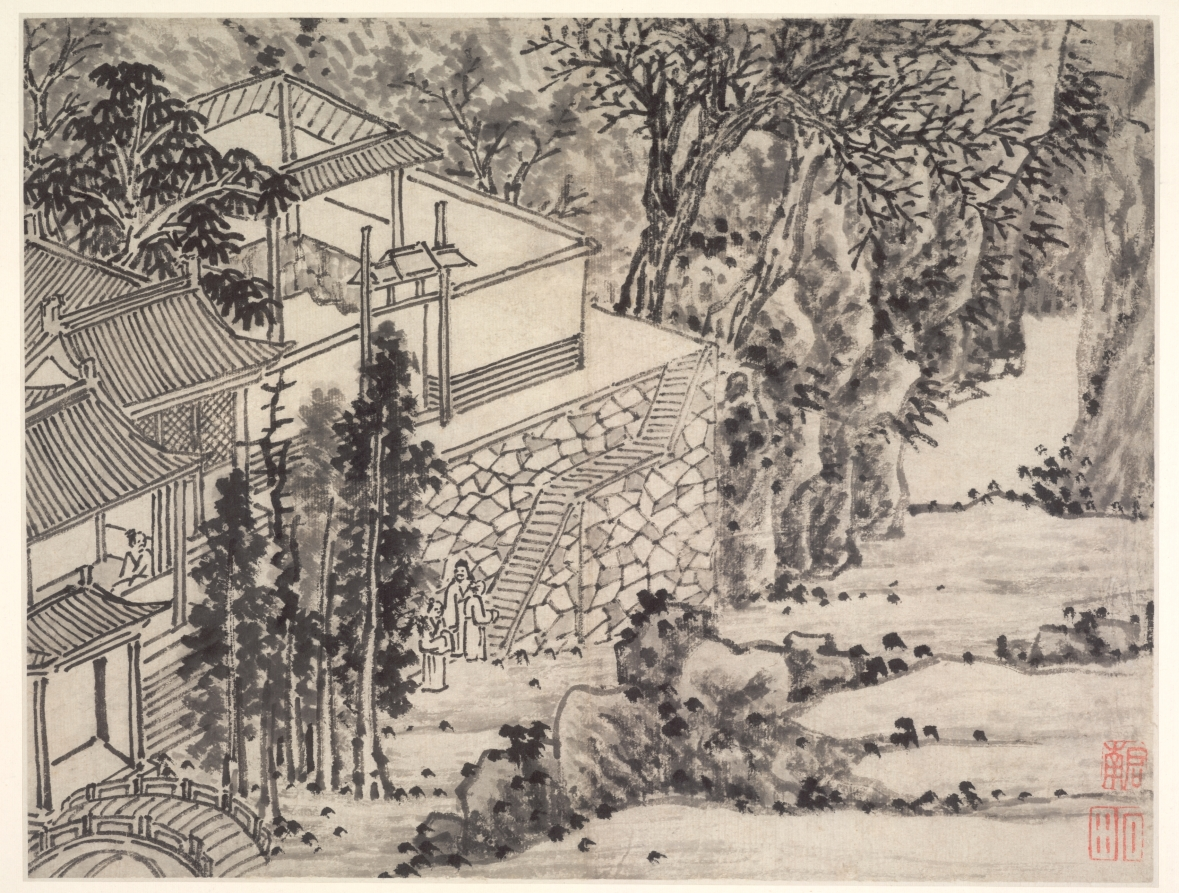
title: The Enlightened Stone Retreat, from Twelve Views of Tiger Hill, Suzhou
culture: China, Ming dynasty (1368–1644)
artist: Shen Zhou (Chinese, 1427–1509)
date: after 1490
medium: Album leaf; ink on paper or ink and slight color on paper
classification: Painting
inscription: [印] 启南; 石田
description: Views of Tiger Hill depicts a historic site a few miles northwest of Suzhou. The scenes simulate a visit from arriving by boat at the foot of the mountain to climbing to Cloudy Cliff Monastery. Representations of the artist’s mature style, Shen Zhou included views in subtle colors in the suite of monochrome scenes. A Suzhou native, Shen Zhou was supported by family wealth and rejected an official career in favor of life as a retired scholar. Turning to painting in midlife, he is regarded as the founder of the Wu School of painting, with its center in Suzhou.